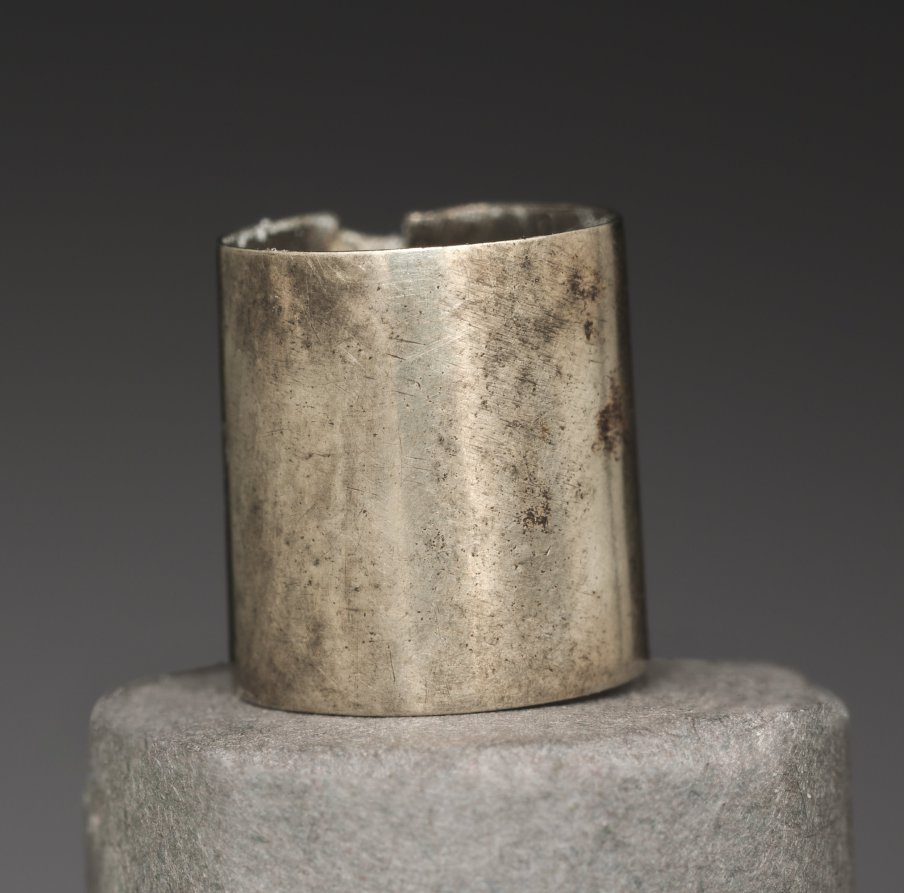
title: Element of Wig Decoration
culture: Egypt, Middle Kingdom (2040–1648 BCE), Dynasty 12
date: 1980–1801 BCE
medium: silver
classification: Jewelry